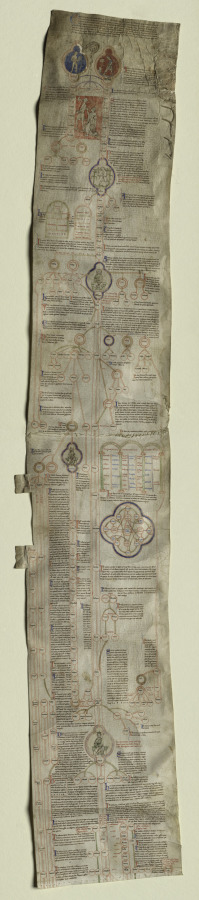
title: Peter of Poitiers's "Compendium Historiae in Genealogia Christi"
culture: England, Canterbury, 13th century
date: c. 1220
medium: ink and tempera on a vellum roll of four membranes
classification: Manuscript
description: This manuscript roll, composed of four membranes formerly stitched together in a continuous roll about nine feet long, has been divided in the middle for easier visibility and study. The text is an abridgment of biblical history focused on the descent of Christ from Adam. It was written by Peter of Poitiers (about 1130–1205), who taught theology and history in Paris and was widely copied. The present roll is an English copy of Peter's text made shortly after his death. Although manuscript rolls were hung on the walls of a classroom as instructional aids to students, some of them have value beyond their textual and historical interest because of the fine quality of their drawings, as seen here. A comparison with Canterbury manuscripts and stained glass of around 1220 is the basis for the attribution to Canterbury. Peter of Poitiers's aim in this project was to assist students prevented from mastering biblical history because of its length and because they were too poor to own books. His text on roll is the briefest possible summary of biblical history. It is arranged in six historical stages, denoting the six ages of the world, as decreed by theological tradition. The first five ages were inaugurated by Old Testament individuals: Adam, Noah, Abraham, David, and Sedecias. The birth of Christ heralded the sixth stage. Beginning at the top of the first membrane, the text consists of brief biographical entries on the ancestors of Christ (Adam, Noah, Abraham, Moses, and David) and other biblical personalities. These extend to the birth of Christ on the fourth membrane, ending with accounts of Hebrew and Roman kings and the Apostles. Each compendium shows the names of the ancestors inscribed within circles, those of direct descent placed vertically in a central column, others scattered in clusters to the right and left. The decoration of the roll consists of a series of medallions of diverse geometrical frames filled with either a figural drawing or a diagram. The style of these pen-and-ink drawings, some illuminated in tempera or tinted with wash, stems from English manuscript and glass painting attributed to the school of Canterbury Cathedral. The style of the museum's illustrations is so close to the stained glass panels made for Trinity Chapel at Canterbury (about 1220) to suggest that an artist active as a glazier in the Cathedral workshop may also have executed the manuscript. In the least, the painter of the roll manuscript was familiar with the style of the painted glass, and on this basis, a date of about 1220 seems appropriate. Additional evidence is supplied by a psalter illuminated at Canterbury shortly before 1220. The figurative scenes in this psalter were apparently illustrated by the same hand that executed the line and wash drawings in the museum's roll.